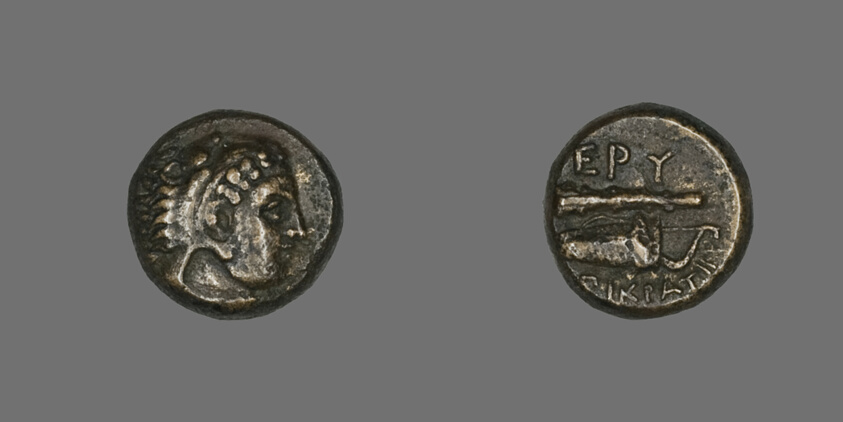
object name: Coin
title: Coin Depicting the Hero Herakles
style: greek, ancient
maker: Greek, minted in Erythrae, Ionia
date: 4th century BCE and later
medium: Bronze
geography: Greece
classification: coin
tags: Heracles, gods (deities)